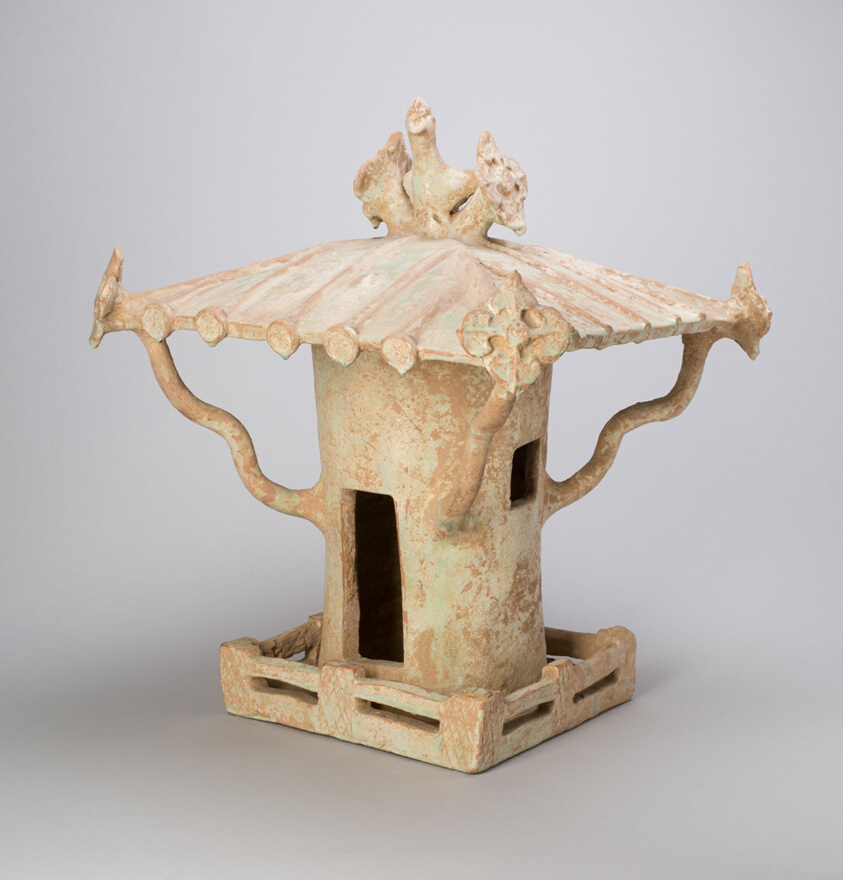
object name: Sculpture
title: Top Story of a Tower (Tomb Model)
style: Chinese (culture or style)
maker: China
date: Eastern Han dynasty (A.D.25–220)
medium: Earthenware with green lead glaze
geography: China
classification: earthenware; ceramics; sculpture; asian art